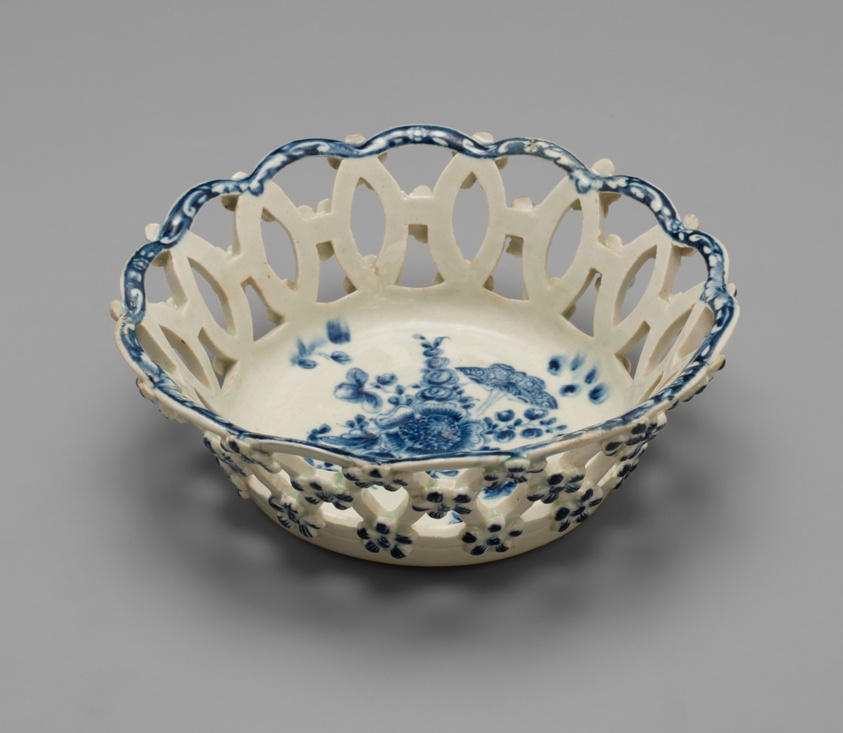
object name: Ceramics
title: Fruit Basket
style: 18th Century, american colonial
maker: American China Manufactory (American, active 1770-72); Philadelphia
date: c. 1770–72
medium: Soft-paste porcelain, underglaze blue decoration, and glaze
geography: Philadelphia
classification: porcelain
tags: flowers, Bonnin and Morris, basketry, butterflies, moth, peonies